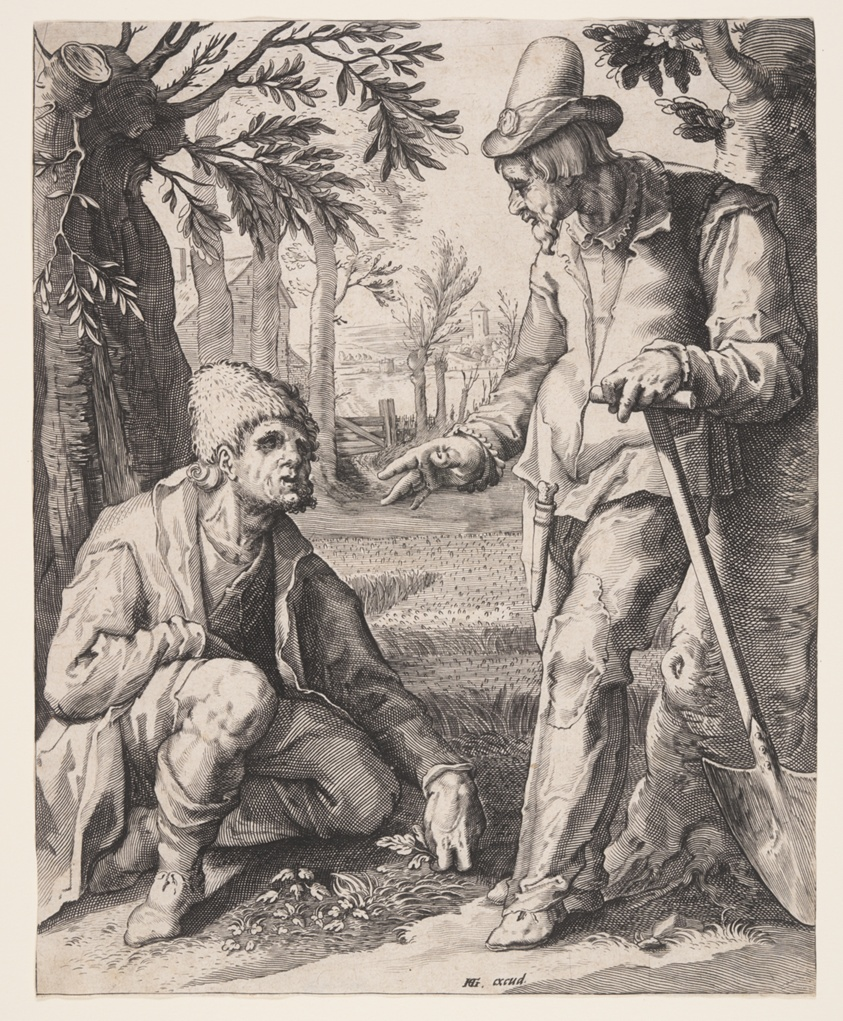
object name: Print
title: Two Peasants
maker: Attributed to Jacob Matham (Dutch, 1571–1631); after Hendrick Goltzius (Dutch, 1558–1617)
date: c. 1590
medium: Engraving on laid paper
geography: Netherlands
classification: print; engraving; paper; prints and drawing